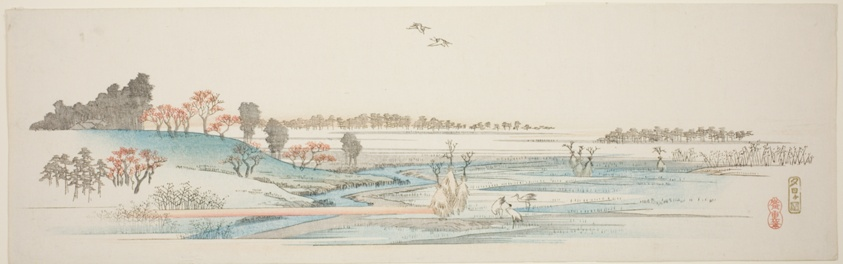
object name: Print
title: Yuhigaoka, from an untitled series of famous views of the Edo suburbs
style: Japanese (culture or style)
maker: Utagawa Hiroshige 歌川 広重; Japanese, 1797-1858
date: c. 1839/40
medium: Color woodblock print; ebangire, surimono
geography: Japan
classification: woodblock print; print; asian art